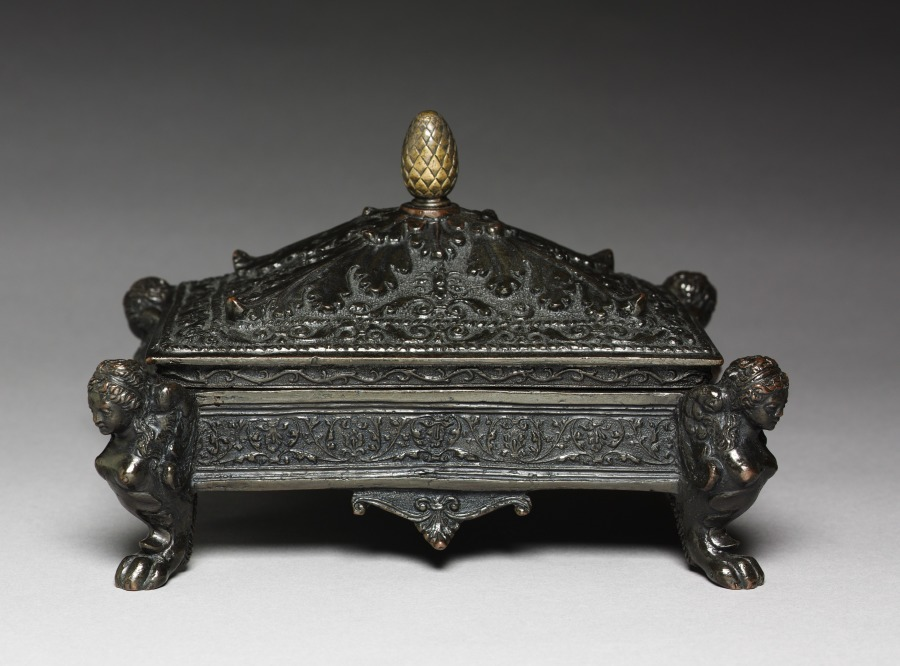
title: Writing Casket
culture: Italy, Ravenna, 16th century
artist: workshop of Severo da Ravenna (Italian, c.1496–c.1543)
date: c. 1525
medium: bronze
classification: Sculpture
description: The interior is divided into four compartments for storing writing implements and sand for blotting.